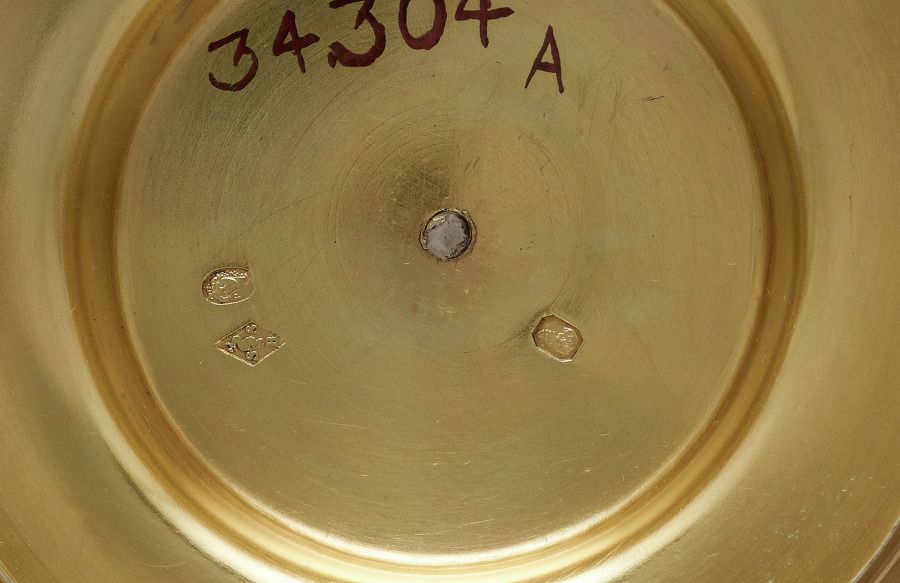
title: Cover for a Chocolate Pot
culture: France, 19th century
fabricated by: Sixte-Simon Rion (French)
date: c. 1830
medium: silver, wooden handle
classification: Silver